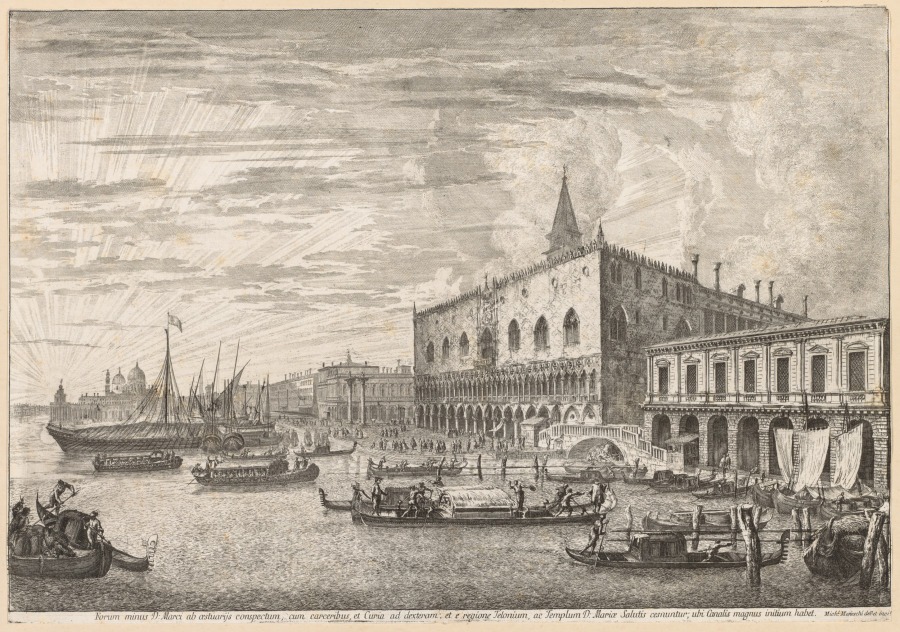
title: Views of Venice: The Molo and S. M. Della Salute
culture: Italy, 18th century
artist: Michele Marieschi (Italian, 1710–1743)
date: 1741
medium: etching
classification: Print